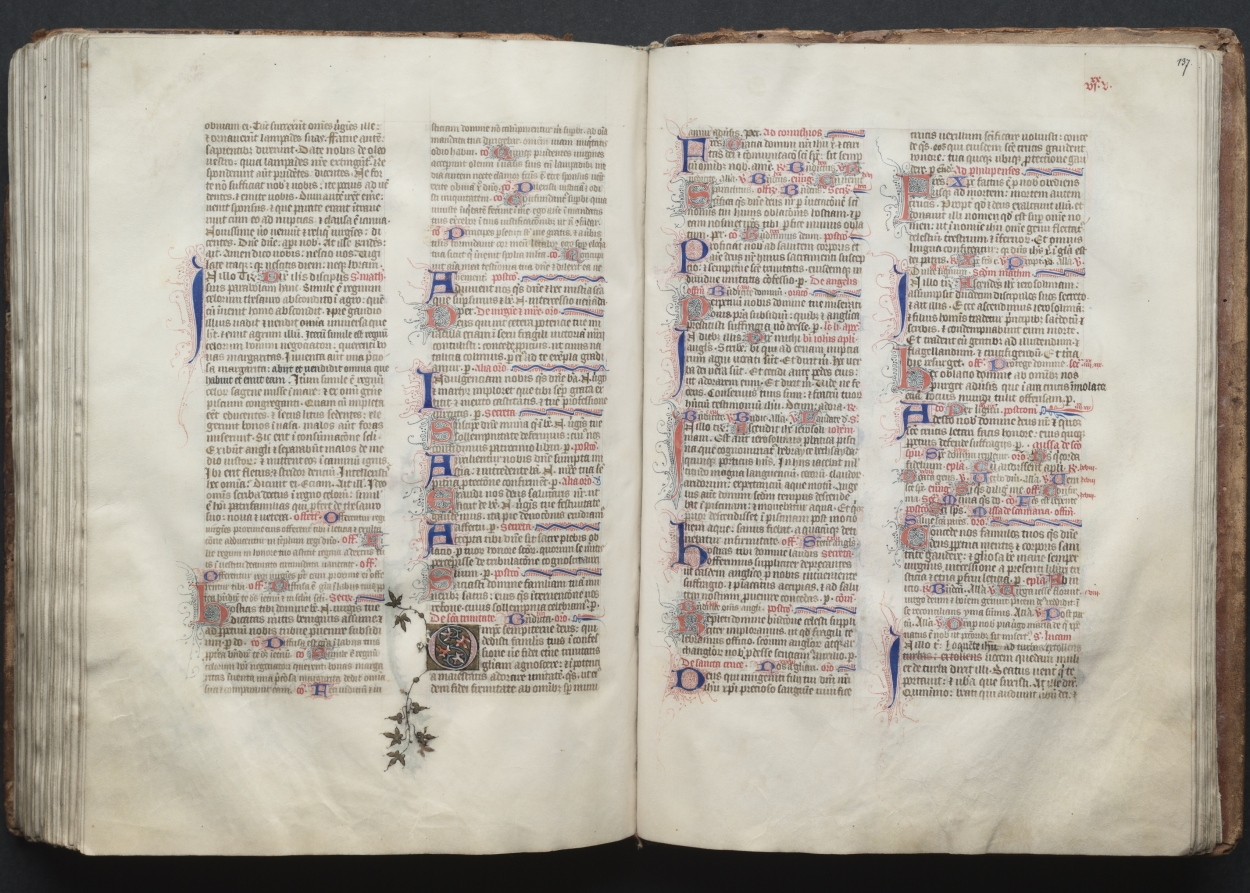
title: The Gotha Missal: Fol. 136v, Text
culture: France, Paris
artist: Master of the Boqueteaux (French)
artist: and Workshop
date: c. 1375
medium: ink, tempera, and gold on vellum; blind-tooled leather binding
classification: Bound Volume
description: The style and quality of this manuscript's decoration is typical of deluxe Parisian books made for aristocratic or royal patrons. Most of the book's decoration appears to be the work of the Master of the Boqueteaux, an artist active at the court of King Charles V (died 1380). His style was apparently shared by a number of book illuminators working in and around Paris. It is very possible that the Gotha Missal belonged to Charles V, but is not provable because the manuscript has no royal portraits and lacks a colophon. Given the book's magnificent decoration, however, it would seem that it was produced for a Valois prince, if not for the king himself. The manuscript receives its name from the German dukes of Gotha, its later owners.